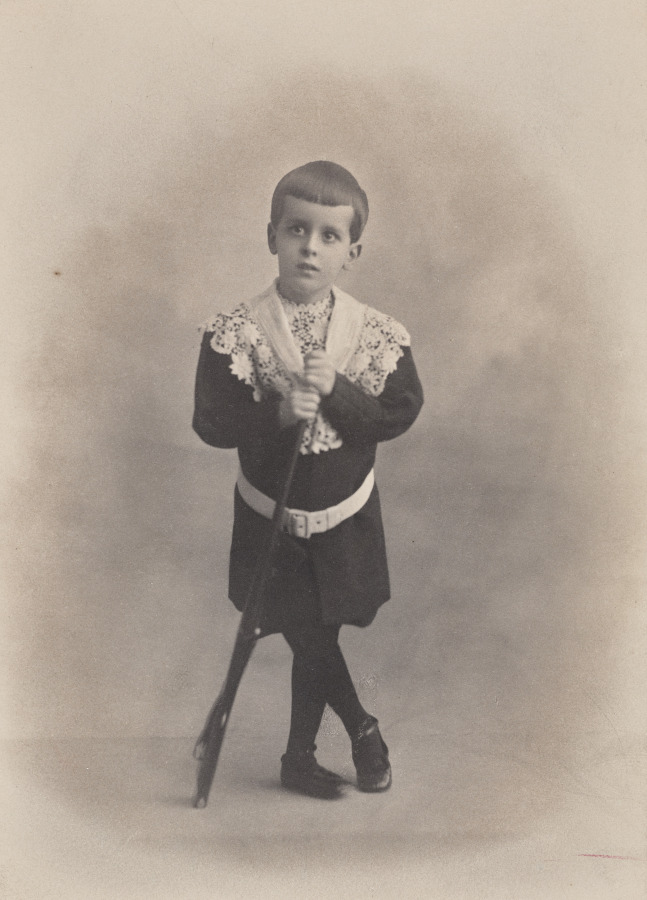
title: Untitled (young boy with lace collar and toy rifle)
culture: France, 19th century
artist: Reutlinger Studios (French, active 1850s-1937)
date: 1880–99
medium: gelatin silver print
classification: Photograph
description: This portrait of a boy holding a rifle suggests an association of masculinity with militarism in that era. Militaristic attitudes had a strong hold in France following the country’s defeat in the 1870–71 Franco-Prussian War. Many French people wanted revenge for Prussia’s annexation of Alsace-Lorraine, territories that did not return to French control at the end of World War I in1919. Looking at this portrait in hindsight, one might wonder if this boy served in the military or was a casualty during that war.